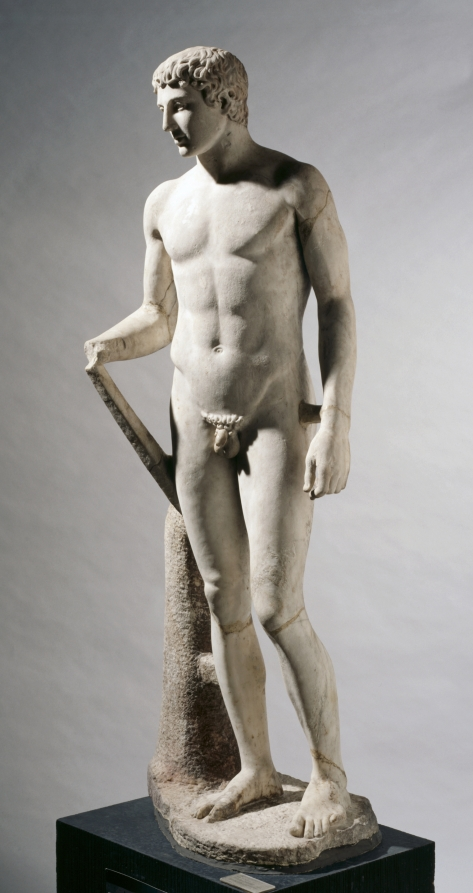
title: Statue of an Athlete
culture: Italy, Roman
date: 1–100 CE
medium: marble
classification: Sculpture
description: This idealized athlete recalls Greek sculptural types invented and popularized during the 400s BC. Large-scale athletes and other sculptures like this were originally created by famous artists as sanctuary dedications. Centuries later, they were widely copied and adapted by Roman sculptors, whose clients sought their own versions of earlier masterpieces. Working in marble rather than bronze, these sculptors added certain elements for stability, such as the struts and the large tree trunk beside the right leg here. Sculptures like this one are profoundly complex, made by and for Romans but descended from Greek ancestors.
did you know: For many years, this sculpture stood in the rotunda of the Cleveland Museum of Art.